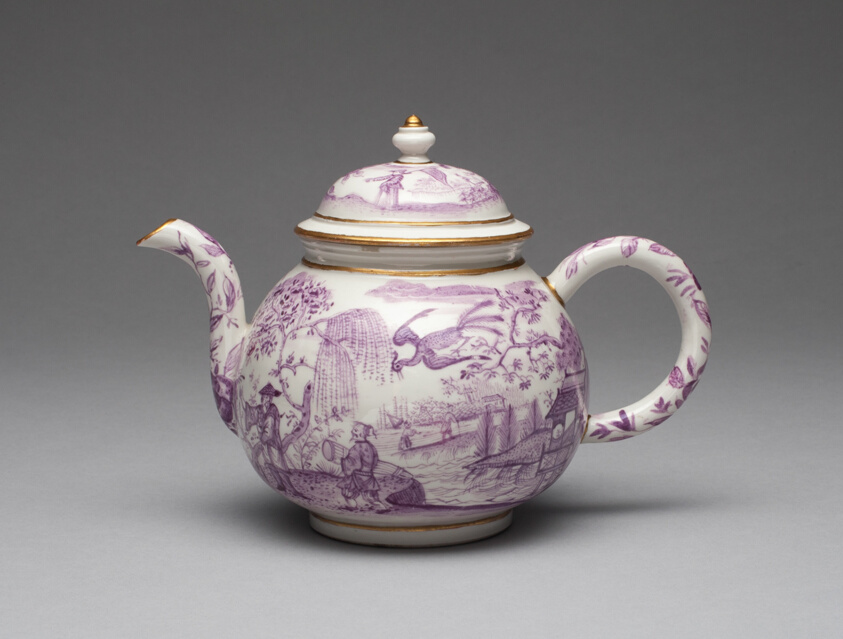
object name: Ceramics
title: Teapot with Cover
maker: Du Paquier Porcelain Manufactory (Austrian, 1718-1744)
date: c. 1730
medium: Hard-paste porcelain, purple enamel, and gilding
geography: Vienna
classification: teapot; teaware; ceramics; porcelain; european decorative arts